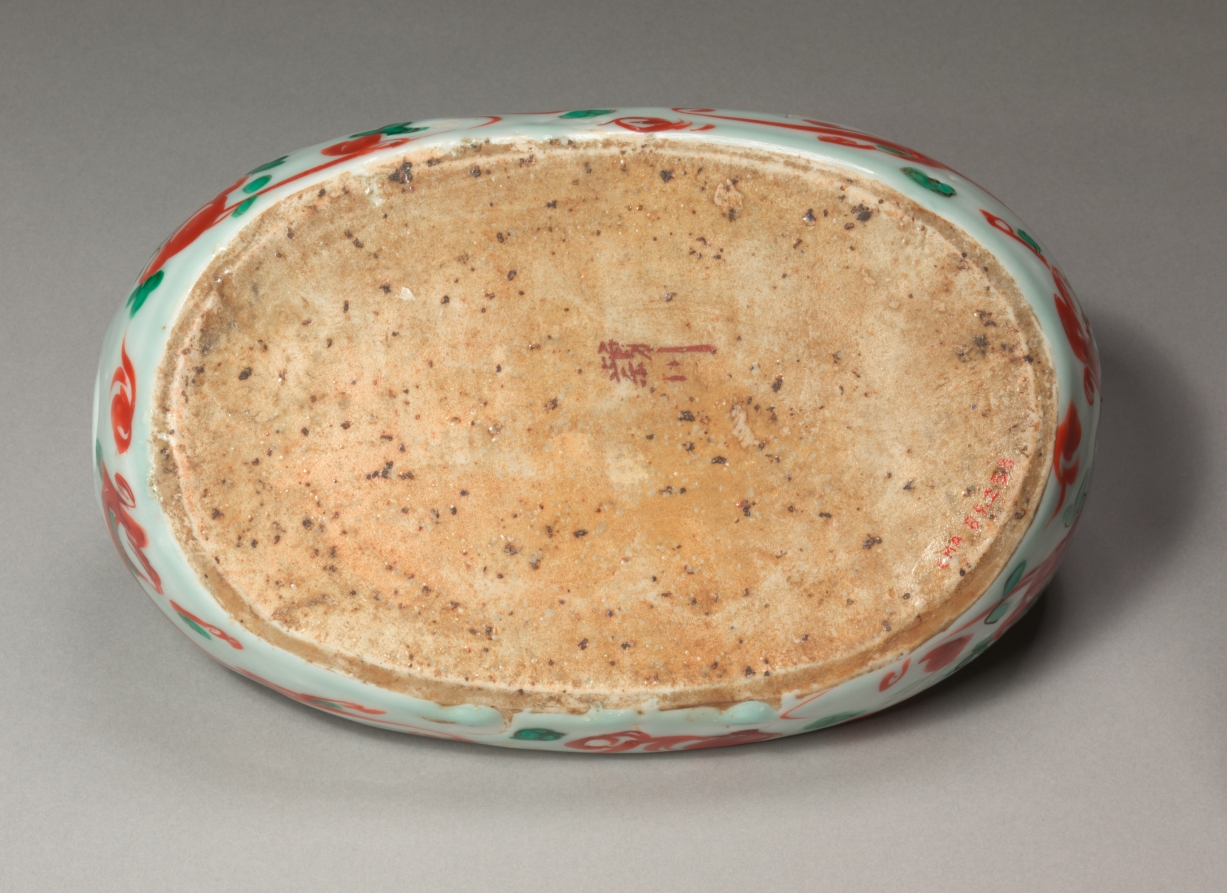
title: Basket Dish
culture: Japan, Edo period (1615–1868)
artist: style of Okuda Eisen (Japanese, 1753–1811)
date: late 1700s–early 1800s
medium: porcelain with overglaze color enamel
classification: Ceramic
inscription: signed "Eisen" in red enamel on base.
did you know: This dish was made for use in the kaiseki meal served in the tea ceremony.